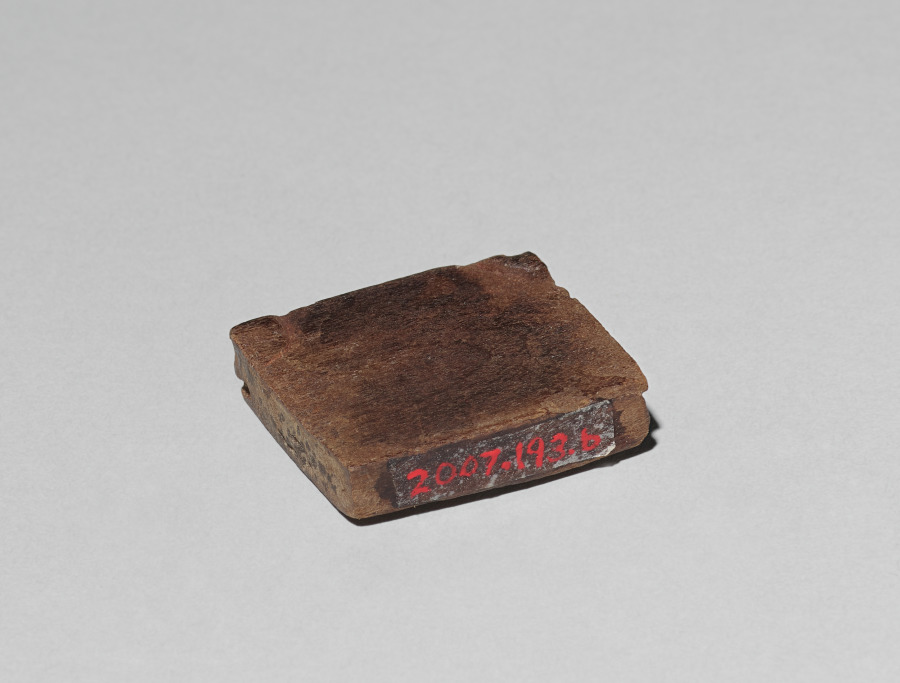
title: plug for the bottom of Container in the form of a Sacrificer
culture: Peru, Middle Horizon, Wari Culture, 7th -11th century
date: 770–890 (radiocarbon date, 95% probability)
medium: wood and red pigment (cinnabar)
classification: Wood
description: This plug is on the bottom of a container that assumes the shape of a magnificent, feline-headed, supernatural sacrificer who draws a knife across the throat of the human it holds in its lap. Severed human heads hang from the feline's belt and dangle by the trachea at the back of its headdress. Sacrifice had a place in Wari religious practice, probably as an unusual and exceptionally precious offering made to entice the benevolence of cosmic forces. Indeed, colonial-period Andean people believed that death was a prerequisite for the renewal of the world.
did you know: Traces of cinnabar, a toxic mercuric sulfide, are visible on the container's surface.